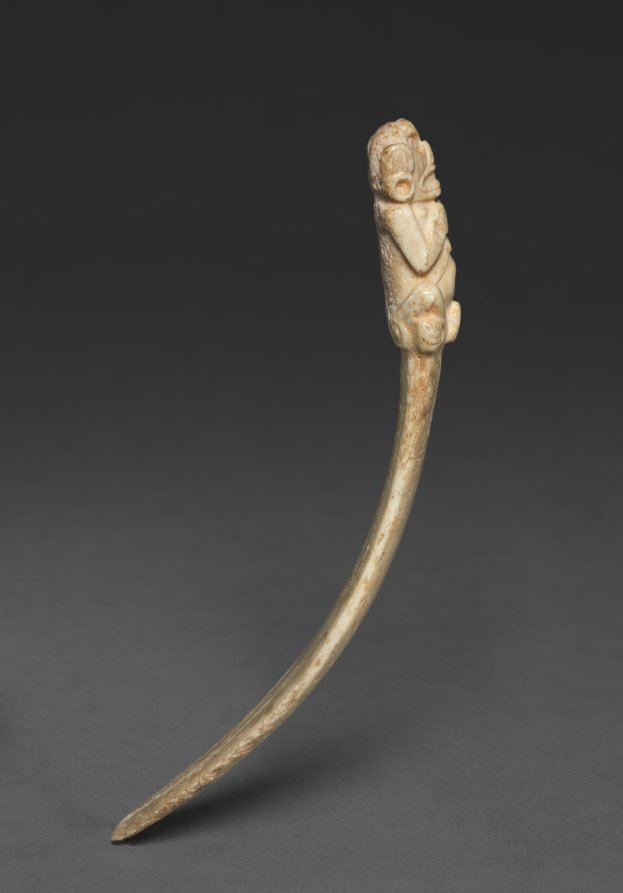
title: Spatula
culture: Caribbean, Greater Antilles, Taino, 10th-15th century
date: 900–1492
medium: manatee bone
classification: Sculpture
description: In 1492, when Christopher Columbus sailed into the Caribbean, the islands of Cuba, Hispaniola (Haiti and the Dominican Republic), Jamaica and Puerto Rico were inhabited by the Taino people. Taino religious ceremonies often included the snuffing of hallucinogenic herbs to alter the consciousness and facilitate contact with the spirit world. Carved spatulas were used to blend the powdered herbs. After purifying the body through purging the stomach, the snuff was inhaled into both nostrils.